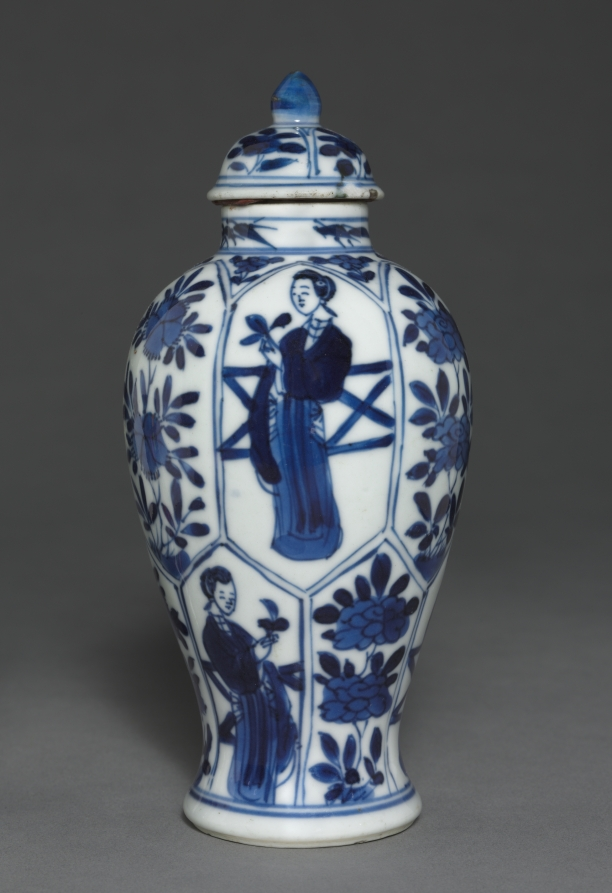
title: Jar with Cover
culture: China, Qing dynasty (1644-1911)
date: 19th Century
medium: porcelain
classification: Ceramic